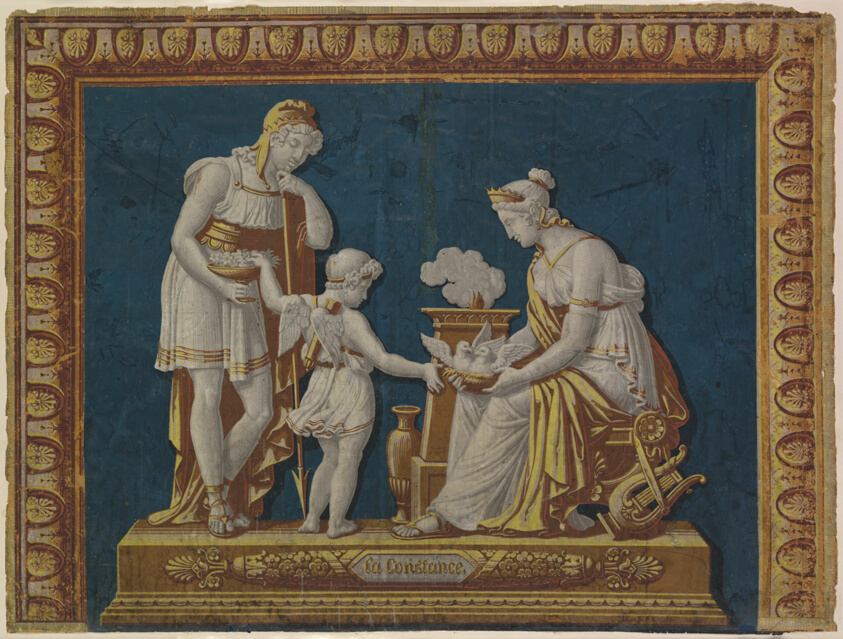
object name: Coverings and Hangings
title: "La Constance" Wallpaper Fire Board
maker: Paris, France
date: 1790/95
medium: Block-printed paper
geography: France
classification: wallpaper; paper; european decorative arts